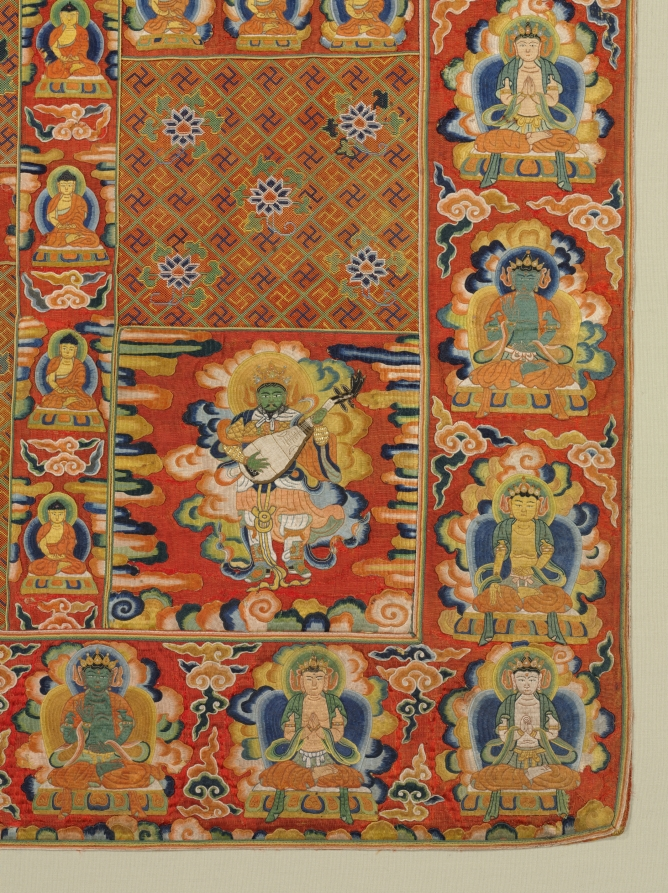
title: Buddhist Priest's Ceremonial Robe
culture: China, Ming dynasty (1368–1644)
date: 1400s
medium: silk and gold thread; embroidery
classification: Garment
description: This example of imperial embroidery is one of the earliest surviving Chinese Buddhist robes (kasaya) in the West. Depicting 991 Buddhas, each slightly different, it is constructed out of patches in reference to the legend in which the Buddha's favorite disciple divided a robe he was given into 30 pieces. Patchwork is also a sign of humility. Multiple Buddha images known as “thousand Buddha” designs are seen painted and sculpted on the walls of cave temples in India, Afghanistan, Central Asia, and China, but are rare on garments. The Four Heavenly Kings, guardians of the four directions, occupy the textile’s corners. When draped around the body, the inverted figures in the upper left corner appear right side up. Robes with 25 columns were worn by the highest-ranking clergy on ceremonial occasions.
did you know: The Five Transcendent Buddhas, who symbolize the purity of the five elements, are repeated around the edges.